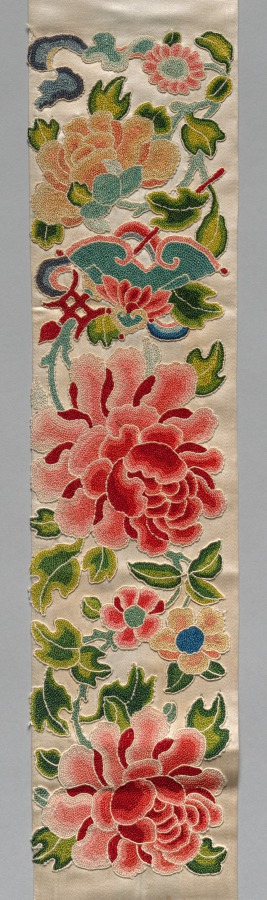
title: Sleeve Band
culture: China, Qing dynasty (1644-1911) or Republican period (1912-49)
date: 1880–1940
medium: Silk, embroidery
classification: Garment